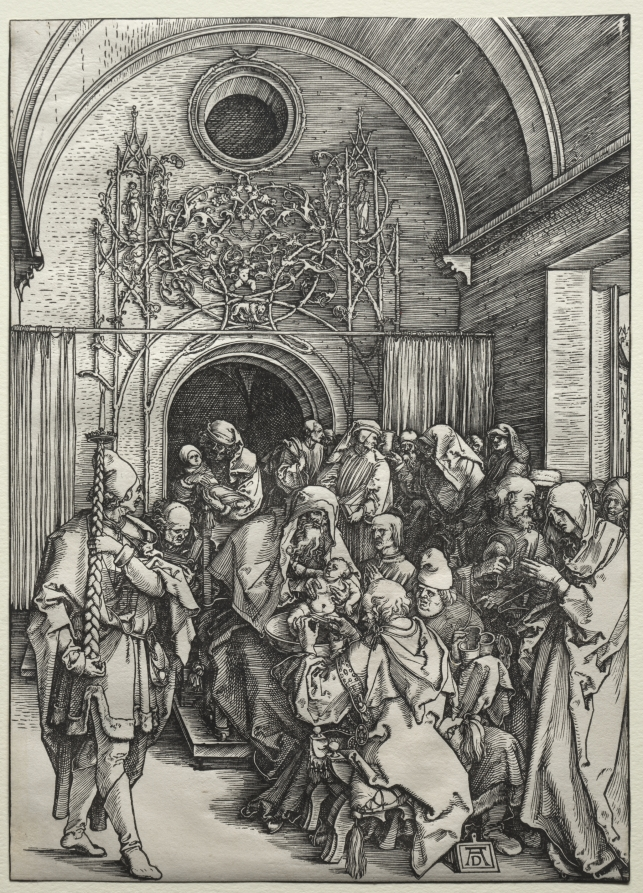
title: The Circumcision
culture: Germany, early 16th Century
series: The Life of the Virgin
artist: Albrecht Dürer (German, 1471–1528)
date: c. 1504–1505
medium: woodcut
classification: Print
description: These eight woodcuts (1959.99.8-15) progress from Gabriel’s announcement to Mary that she would bear the Son of God, to the events of her early motherhood and beyond. This included the joy of sharing her pregnancy with her cousin Elizabeth, Jesus’s birth, and the subsequent arrival of the magi. After Jesus’s circumcision and presentation at the temple the Holy Family fled to Egypt to avoid Herod and stayed there for several years. The seemingly out of place last scene shows a glimpse of their daily life in Egypt as Joseph continues his carpentry and Mary spins wool. The Holy Family is surrounded by angels and helpful putti and are blessed by God the Father and the Holy Spirit in the form of a dove overhead.